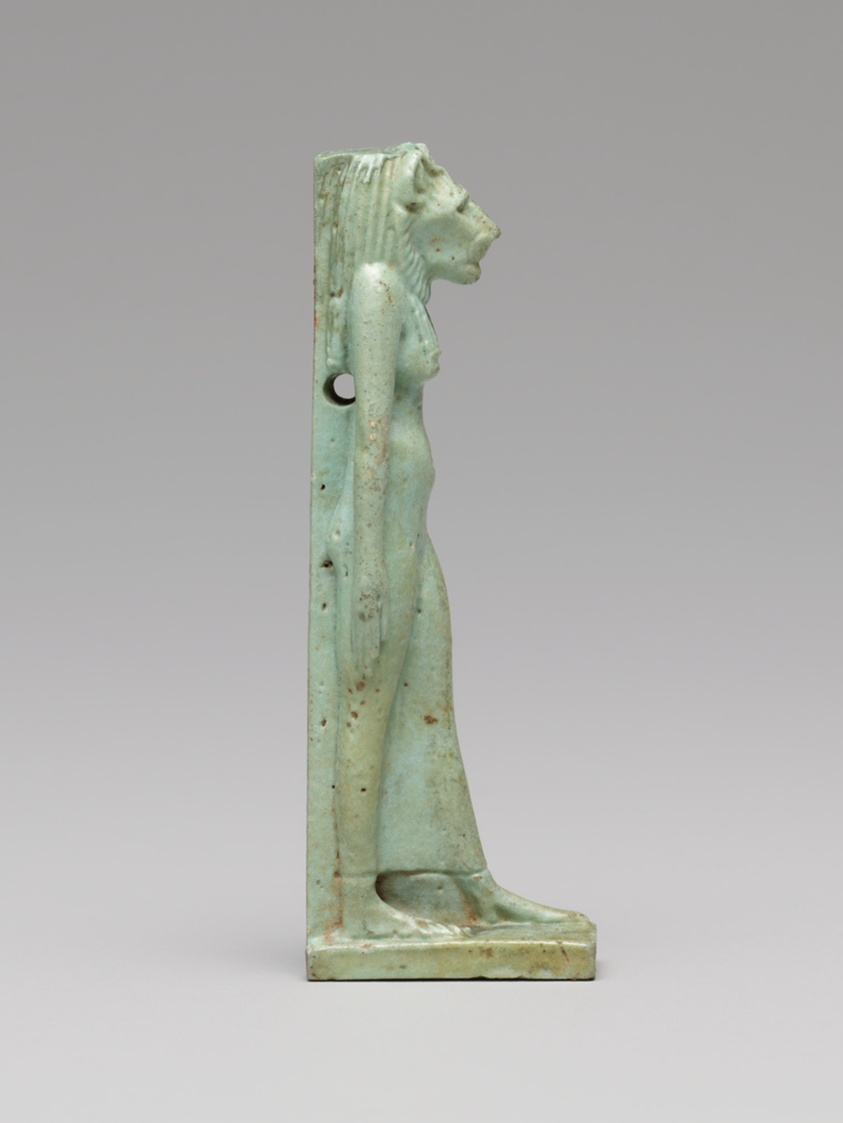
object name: Costume and Accessories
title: Amulet of Sekhmet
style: third intermediate period, egyptian, ancient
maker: Egyptian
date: Third Intermediate Period (about 1069–664 BCE)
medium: Faience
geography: Egypt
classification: amulet; jewelry; ceramics; ancient art; costume; faïence (composite material)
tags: goddesses, animals, lions, cats